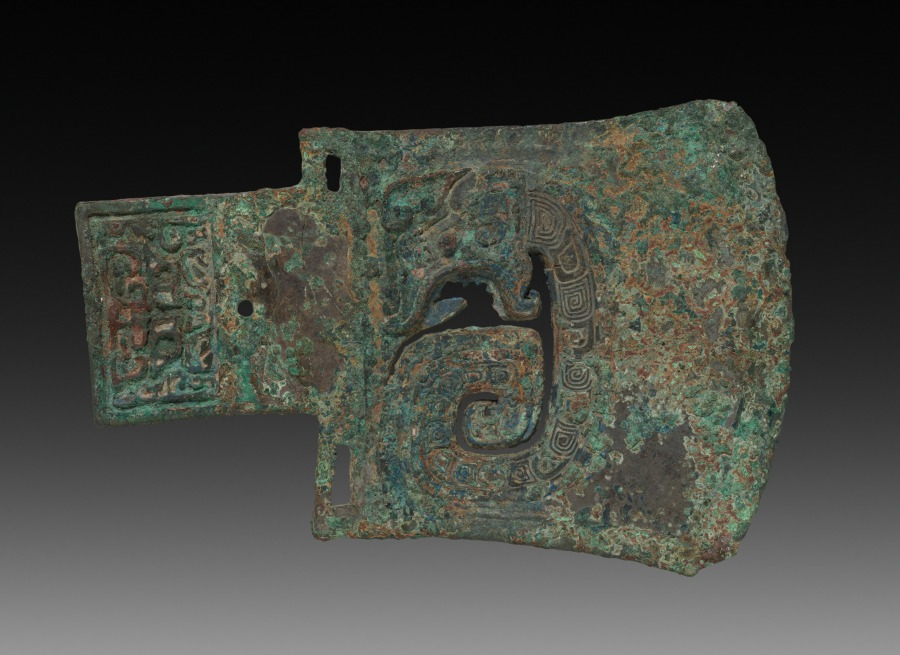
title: Axe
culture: China, Shang dynasty (c. 1600–c. 1046 BCE)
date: 1766–1045 BCE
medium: bronze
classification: Metalwork